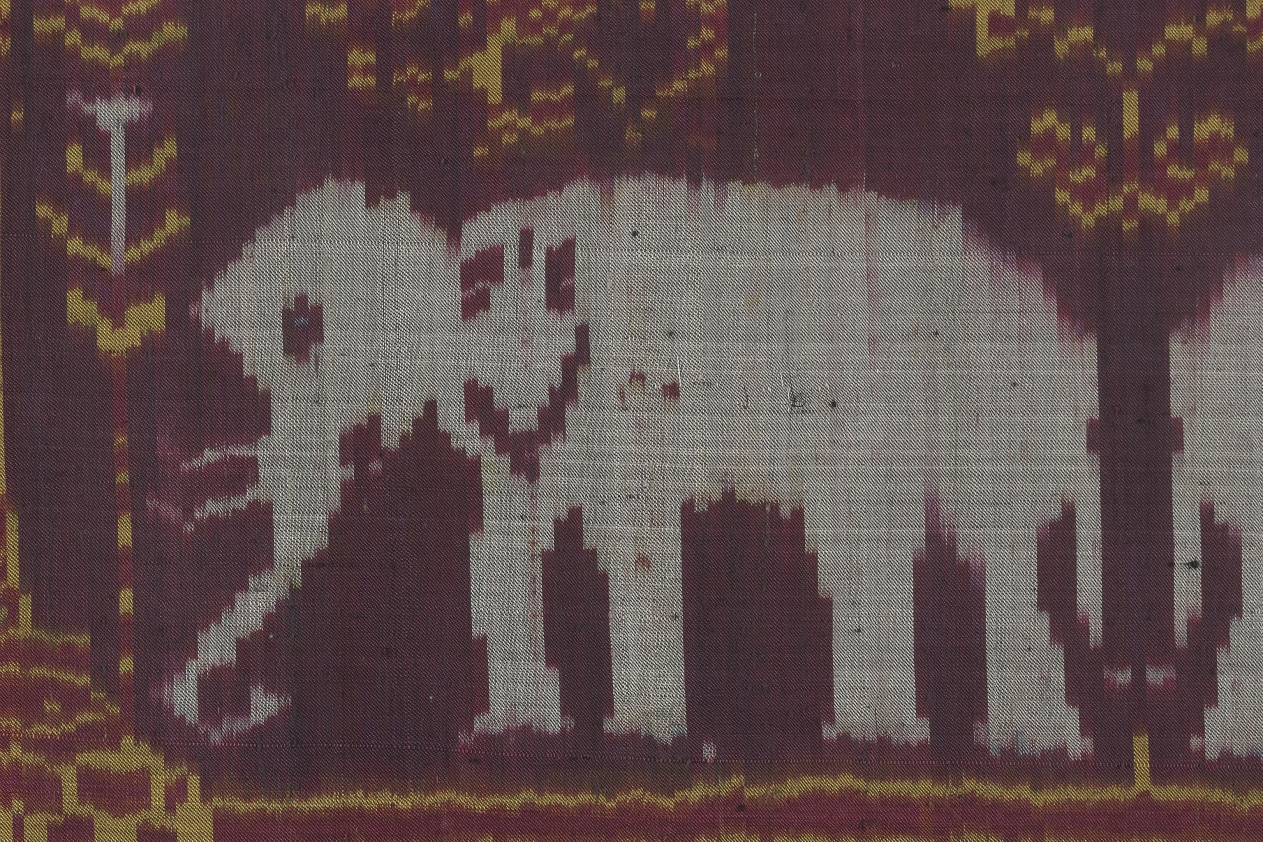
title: Wall Hanging or Ceiling Canopy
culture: Cambodia, Khmer People, early 20th century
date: early 1900s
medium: tabby weave, weft ikat; silk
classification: Textile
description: The silk wefts of this textile were resist dyed with a design of elephants, temples, large tigers (?), sacred trees, and humans before the textile was woven. Both the weft-ikat technique and the motifs reveal the influence of Indian textiles, particularly patola. The dark reddish-maroon color of the ground, however, was not produced by over-dyeing, as in India and Bali, but by the combination of red wefts with black warps. This silk was made to serve as a wall hanging or ceiling canopy in a Buddhist temple.